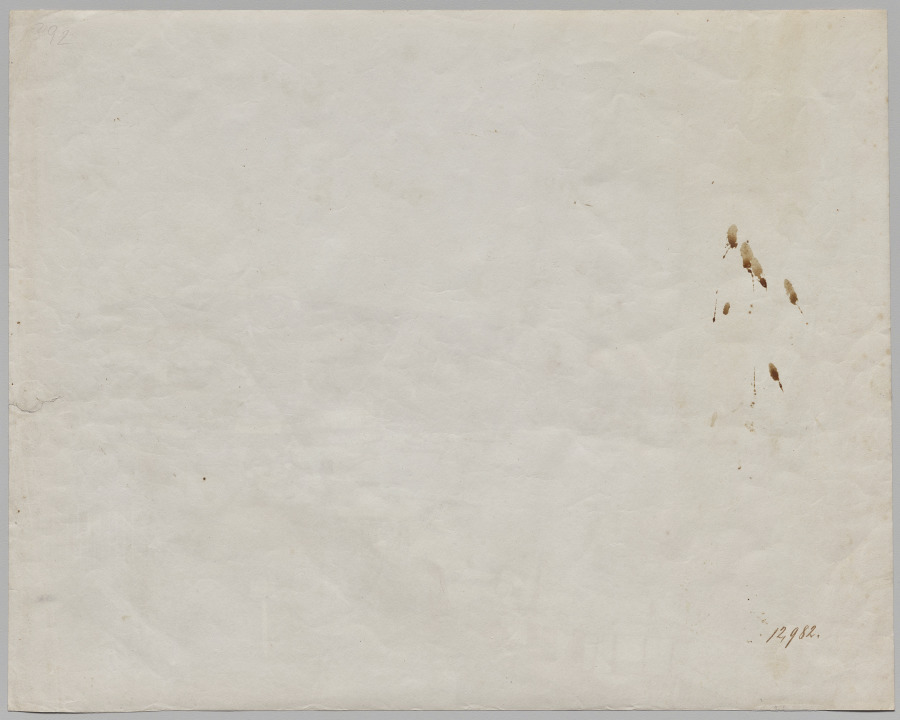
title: View of Ste-Adrese Beach with the Dumont Baths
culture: France, 19th century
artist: Gustave Le Gray (French, 1820–1884)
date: 1856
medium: albumen print from collodion negative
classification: Photograph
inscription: In graphite on verso: “392”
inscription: Written in brown ink on verso: “12,982”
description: One of the pioneering masters of French landscape photography, Gustave Le Gray shows us the bathing establishments and tourist hotels that dominated the waterfront of this town on the coast of Normandy. Monet focused instead on the more picturesque and timeless beach and fishing boats. Le Gray’s image is distinctly rooted in the present—that is, the present of 1856—in a way that seems shockingly modern.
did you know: Claude Monet painted this same beach, but his works avoid precisely what Gustave Le Gray’s camera reveals.